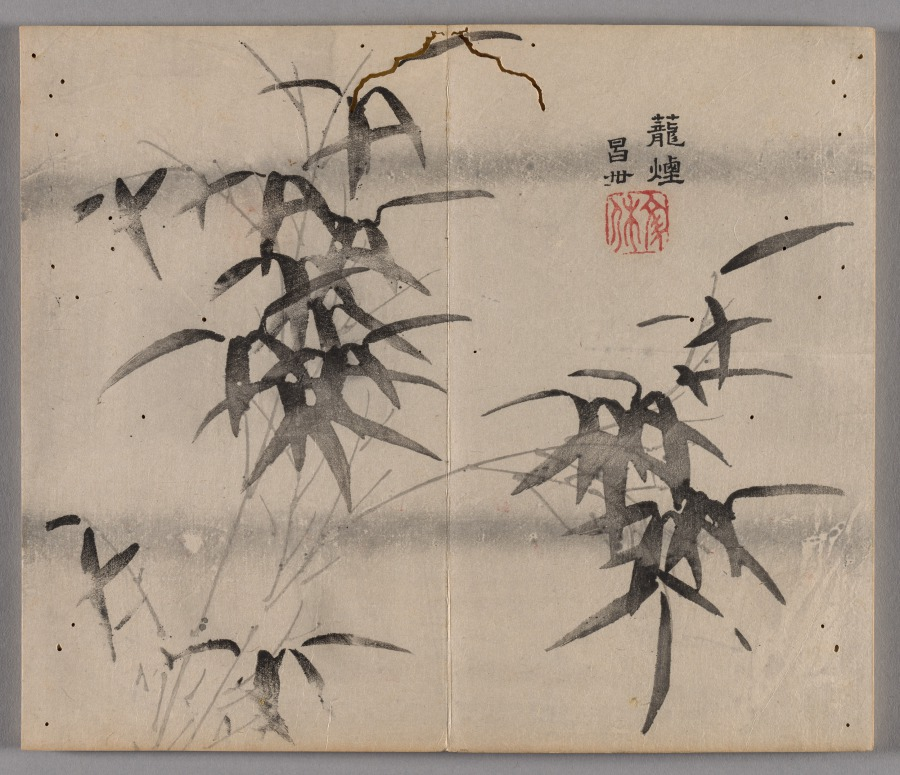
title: Ten Bamboo Studio Painting and Calligraphy Handbook (Shizhuzhai shuhua pu): Bamboo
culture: China, Qing dynasty (1644-1911)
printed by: Hu Zhengyan (Chinese, c. 1584–1674)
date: 1633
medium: Woodblock-printed book; ink and colors on paper; first edition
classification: Print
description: Color printing reached a level of perfection in the early 1600s, as seen in this Ten Bamboo Studio Collection of Calligraphy and Painting and the Mustard Seed Garden Manual of Painting (printed 1679 and 1701). The painterly quality, precision in registering (aligning) the woodblocks, and harmonious colors made them the most successful color print editions in Chinese history. Both editions were printed and compiled in Nanjing, spread nationwide, and had a great impact on the arts in Japan and Korea.